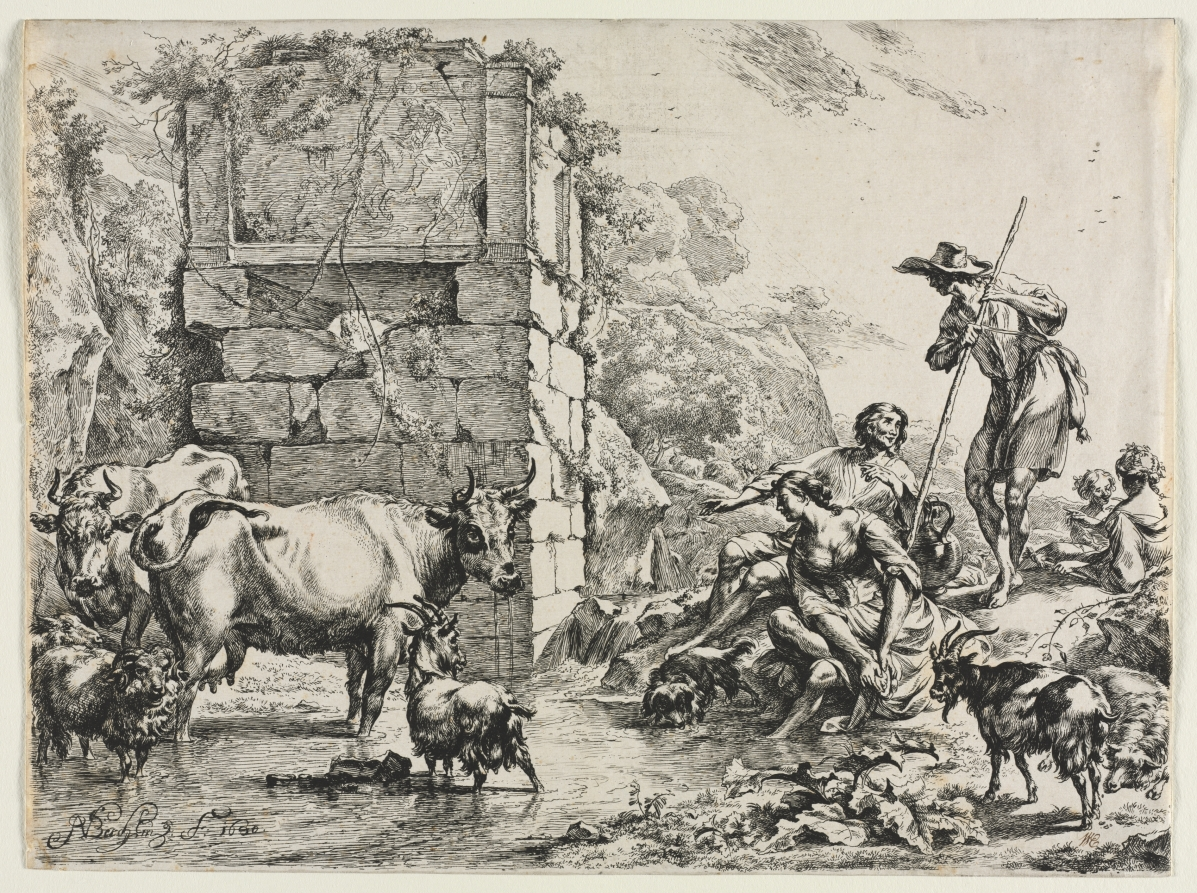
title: The Cow Drinking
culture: Netherlands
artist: Nicolaes Berchem (Dutch, 1620–1683)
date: 1680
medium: etching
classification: Print